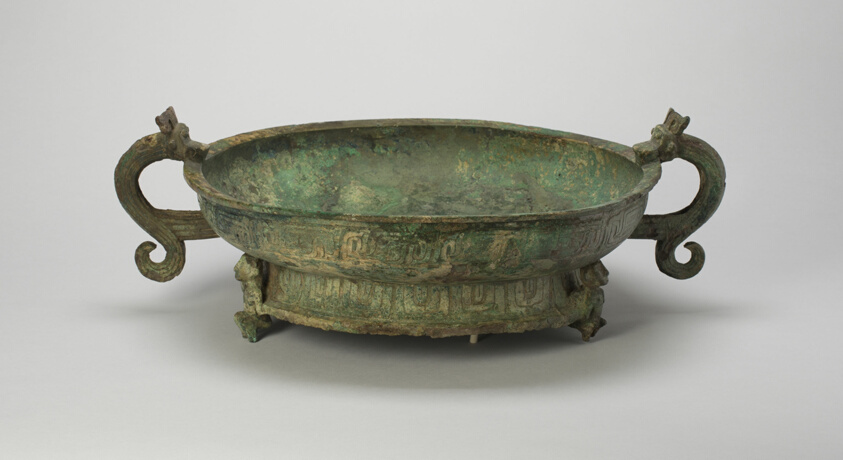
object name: Vessel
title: Basin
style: Chinese (culture or style)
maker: China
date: Western Zhou dynasty ( 1046–771 BC ), 9th/7th century B.C.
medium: Bronze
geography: China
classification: bronze; metal; vessel; asian art